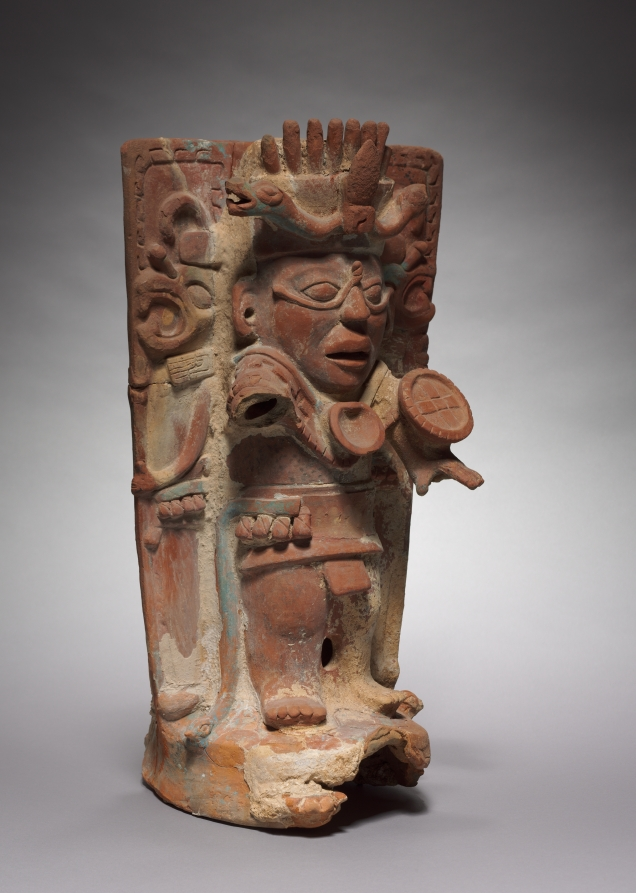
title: Incense Burner Support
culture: Mexico, Chiapas, Palenque Region, Maya, Classic period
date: 600–900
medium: pottery with polychrome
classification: Sculpture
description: This stand, made of a large tube with side panels, originally held a bowl used to ritually burn incense. Modeled on the front is a group that includes the Maya sun deity and two flanking, profile figures in lower relief. All are supported by a turtle, a symbol of the earth and the underworld. Thus, the ensemble may be a model of the cosmos.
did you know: Calcium deposits indicate this incense burner was found in a cave, which the Maya viewed as entrances to the underworld.